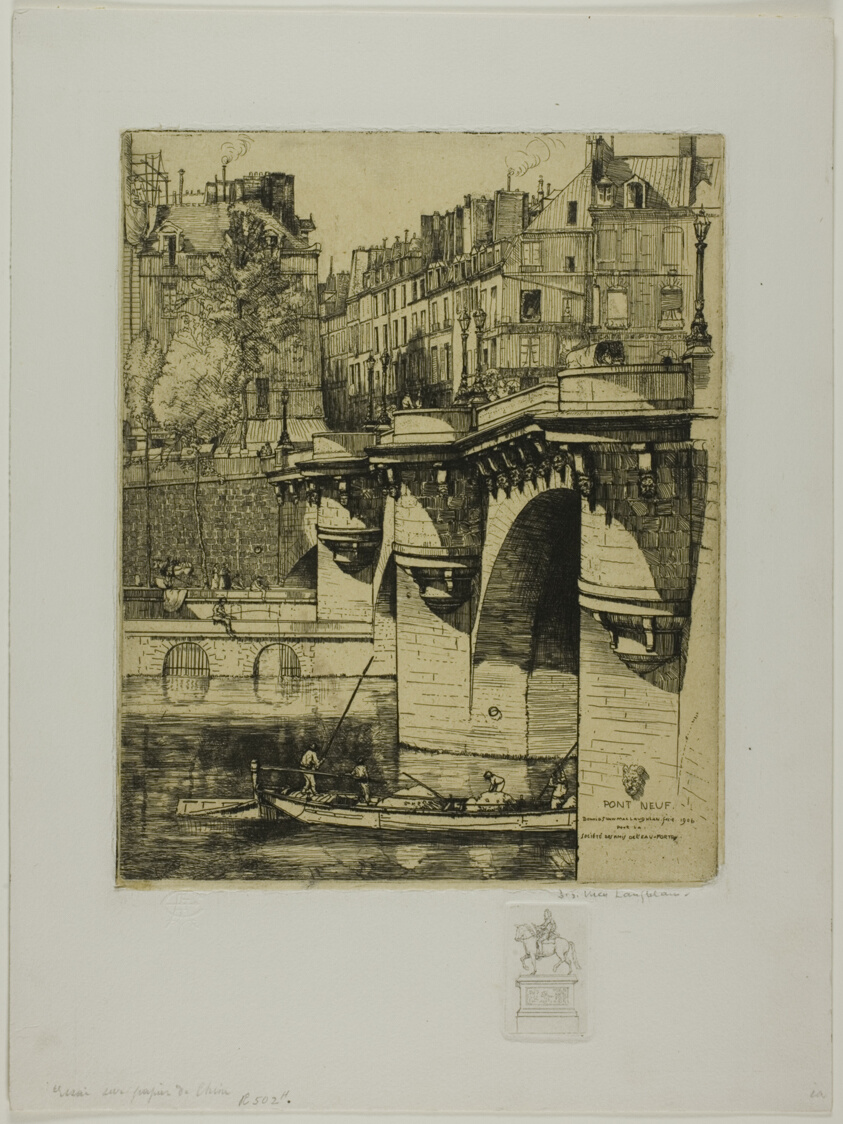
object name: Print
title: Le Pont Neuf, Paris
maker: Donald Shaw MacLaughlan (American, born Canada, 1876-1938)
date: 1906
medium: Etching in black on chine collé with etched remarque on white wove paper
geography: United States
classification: etching; print; prints and drawing